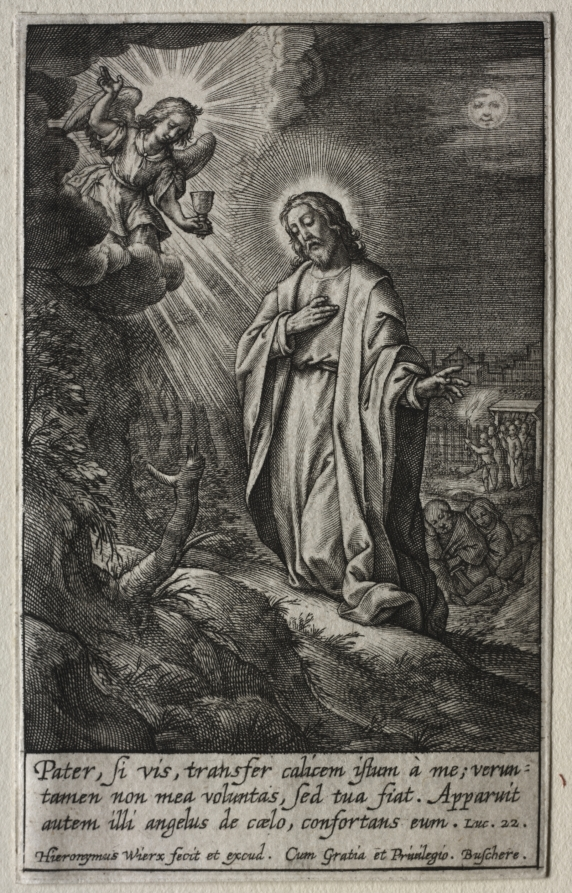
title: The Passion: The Agony in the Garden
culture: Flanders, late 16th-early 17th century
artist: Hieronymus Wierix (Flemish, 1553–1619)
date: before 1619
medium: engraving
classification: Print